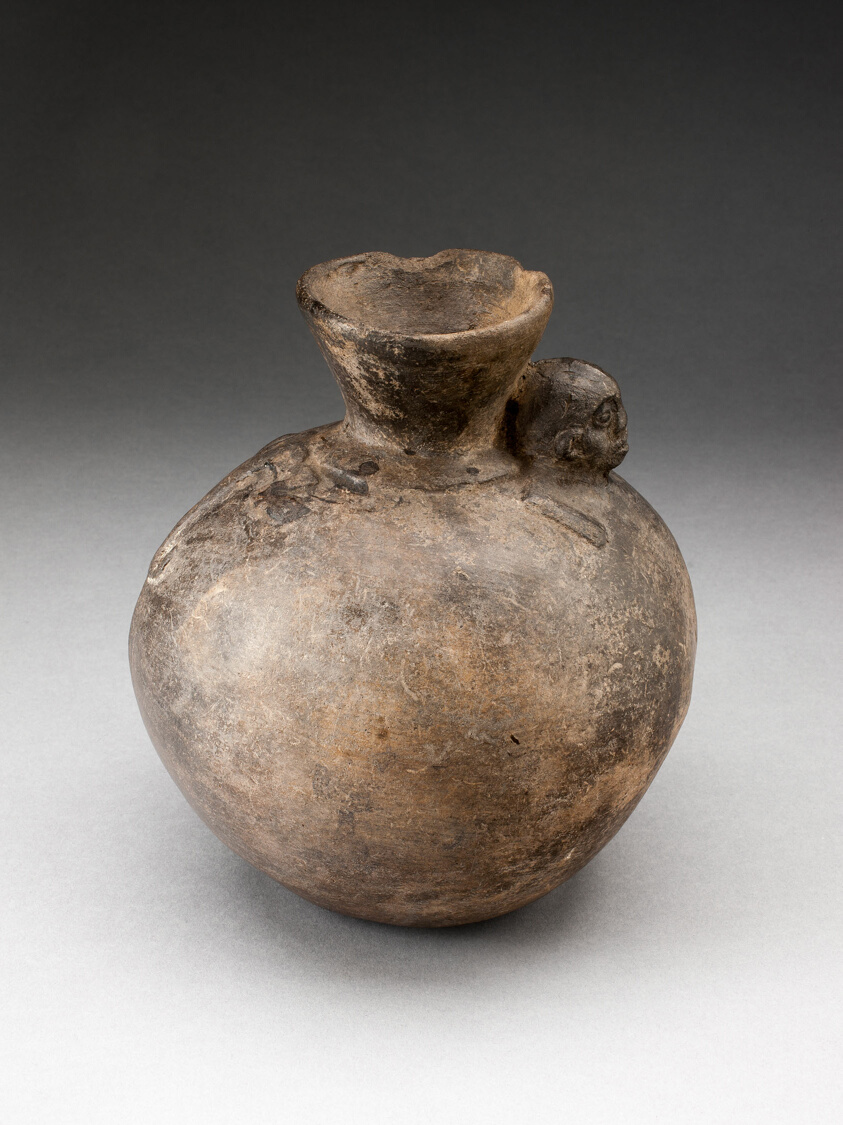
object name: Vessel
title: Brownware Jar with Monkey in Relief on Flared Neck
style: chimú, late intermediate period, Pre-Columbian, americas, Arts of the Americas, andean, andes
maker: Chimú (North coast, Peru)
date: 1000–1400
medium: Ceramic and pigment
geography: Peruvian North Coast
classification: blackware (black basaltes); earthenware; ceramics; vessel; art of the americas